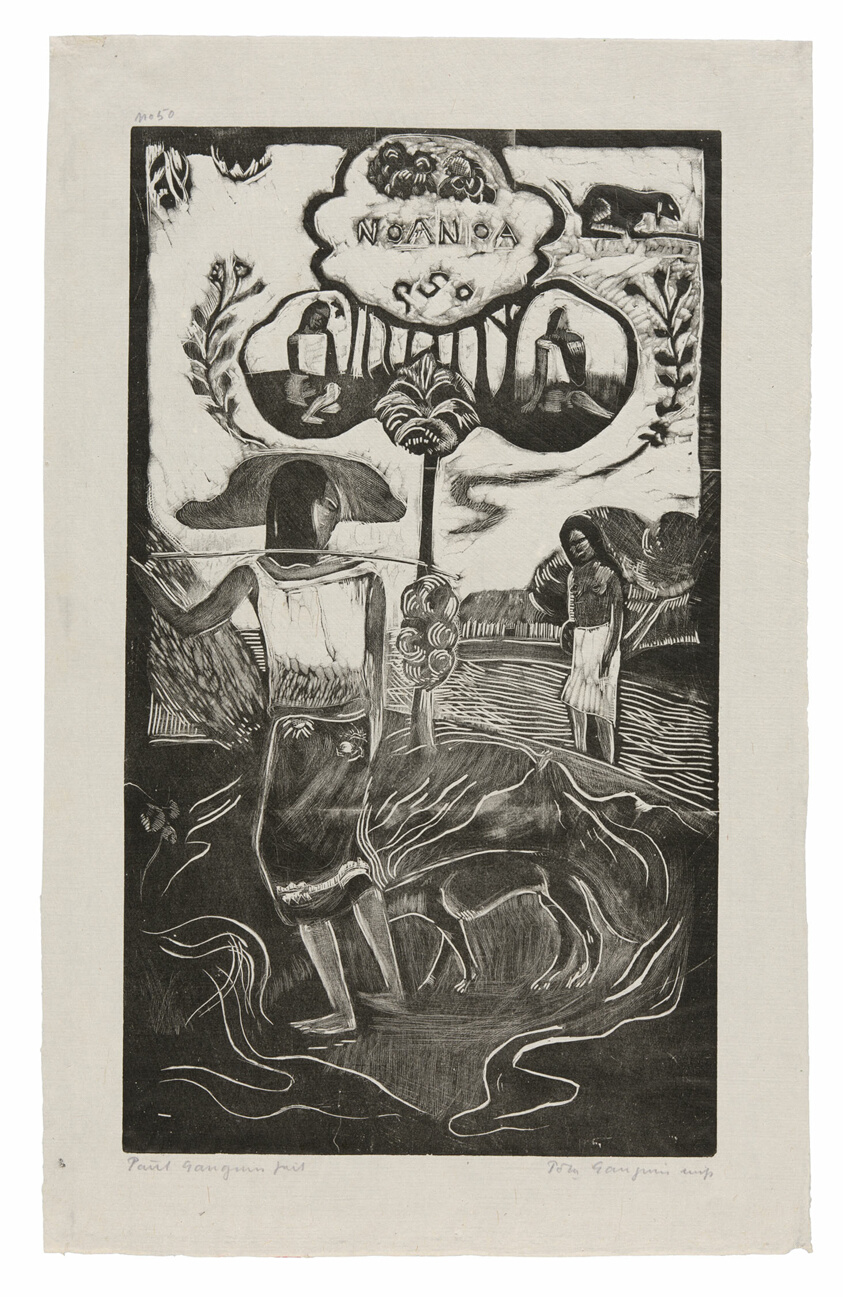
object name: Print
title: Noa Noa (Fragrant), from the Noa Noa Suite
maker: Paul Gauguin (French, 1848-1903); printed by Pola Gauguin (Danish, born France, 1883-1961); published by Christian Cato, Copenhagen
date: 1893–94, printed and published 1921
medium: Wood-block print in black ink on grayish-ivory China paper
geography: France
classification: woodcut; print; prints and drawing